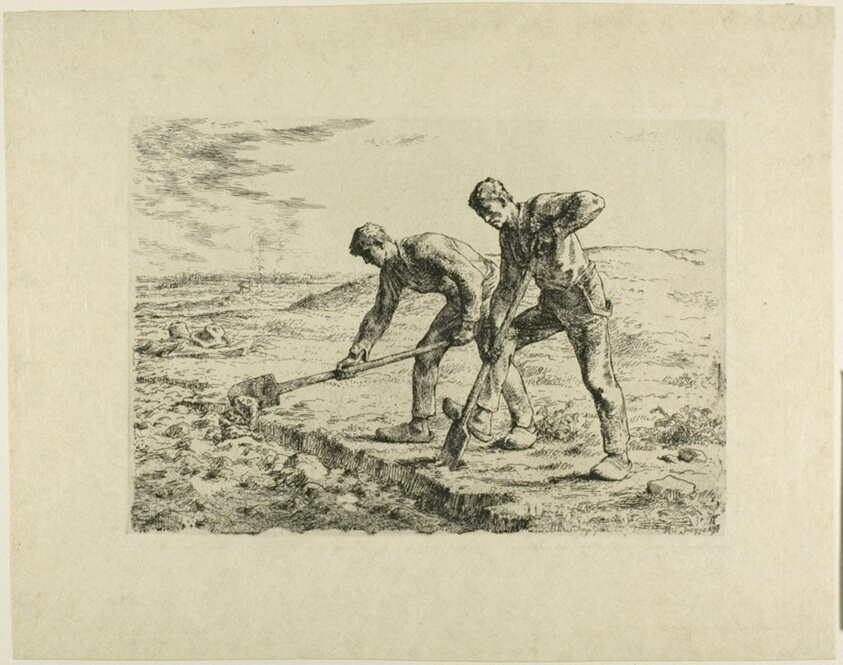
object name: Print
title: Two Men Digging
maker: Jean François Millet (French, 1814-1875); printed by Auguste Delâtre (French, 1822-1907)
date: 1855–56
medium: Etching on cream laid Japanese vellum hinged to ivory card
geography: France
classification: etching; print; prints and drawing